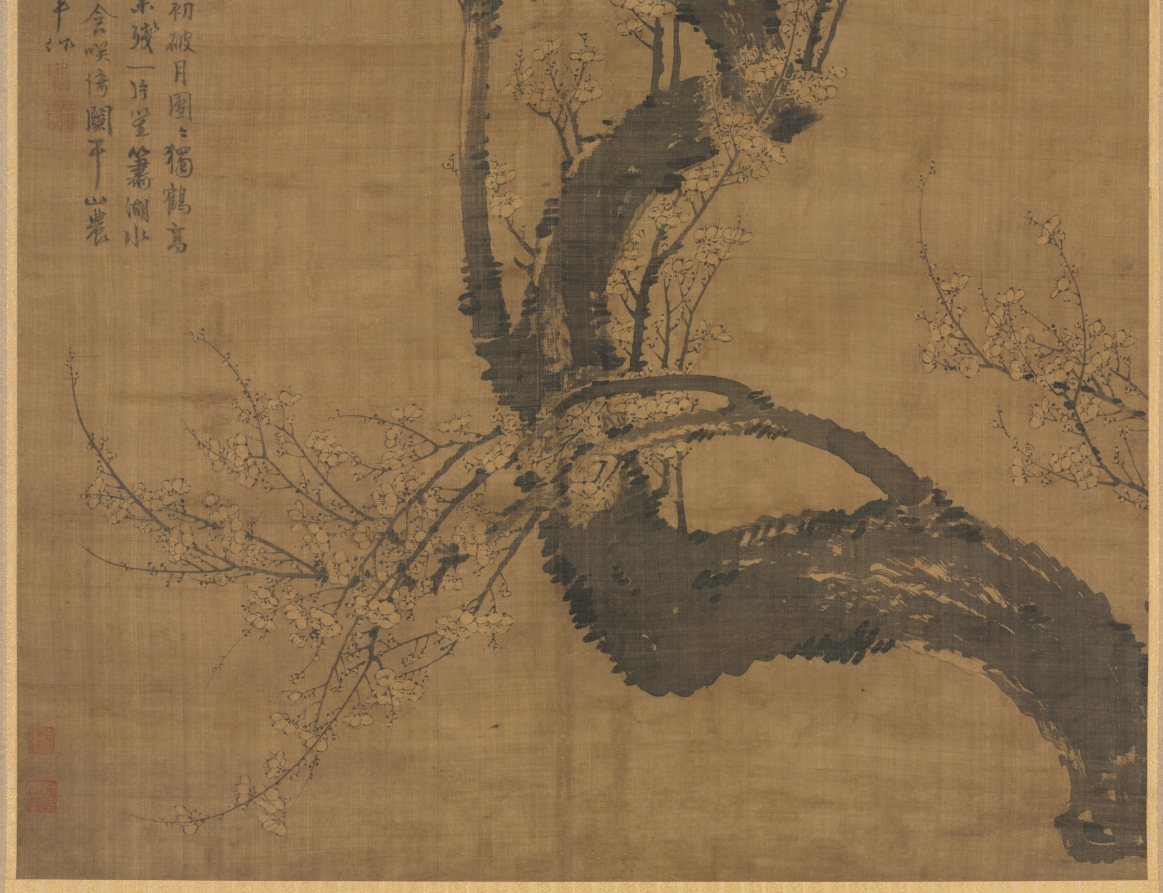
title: A Prunus in the Moonlight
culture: China, Yuan dynasty (1271-1368)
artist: Wang Mian (Chinese, 1287–1359)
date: 1300s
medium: Hanging scroll; ink on silk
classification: Painting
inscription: 8 additional seals: 6 of the Qianlong 乾隆 emperor (r. 1736-95); 2 of Dong Gao 董誥 (1740-1818).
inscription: 海雲初破月團團，獨鶴高飛夜未殘。/ 一片笙簫湖水上，玉妃含笑倚闌干。 王元章作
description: The plum flourishes in the mild climate of the south, and it was not before the Six Dynasties period (220– 589 CE) that the motif began to be appreciated by southern artists, many of whom had emigrated from the north. Wang Mian from Zhejiang province had failed the civil and military service examinations and later rejected appointments under the Mongol government. Instead, he chose to return home, making a living by selling plum paintings. Few of Wang’s works have survived, but they demonstrate that by his time the ink-plum (momei) genre was fully developed.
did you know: The painting portrays the plum in the nighttime, as indicated by the tint of the background and the presence of the moon.